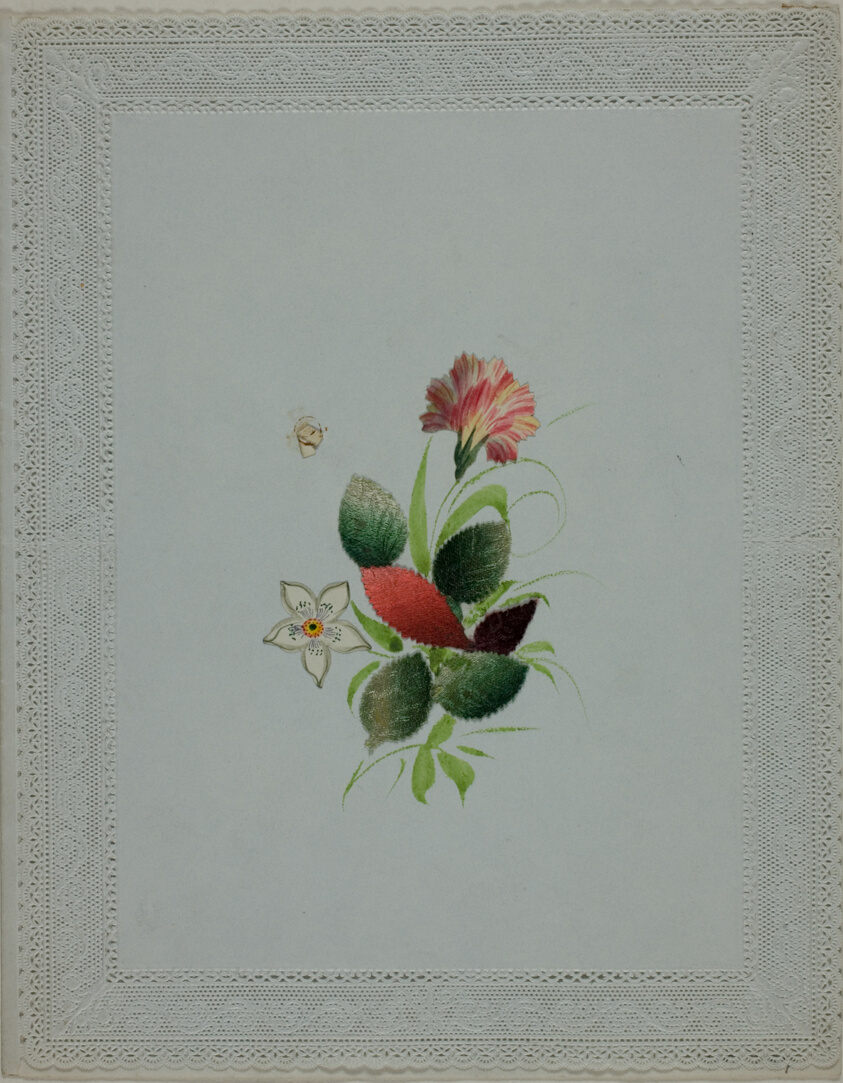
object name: Drawing and Watercolor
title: Untitled Valentine (Pink and White Flowers)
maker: Unknown Artist; English, 19th century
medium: Collaged elements and watercolor on cut and embossed off-white wove paper (lace)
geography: England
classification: valentine; prints and drawing; paper